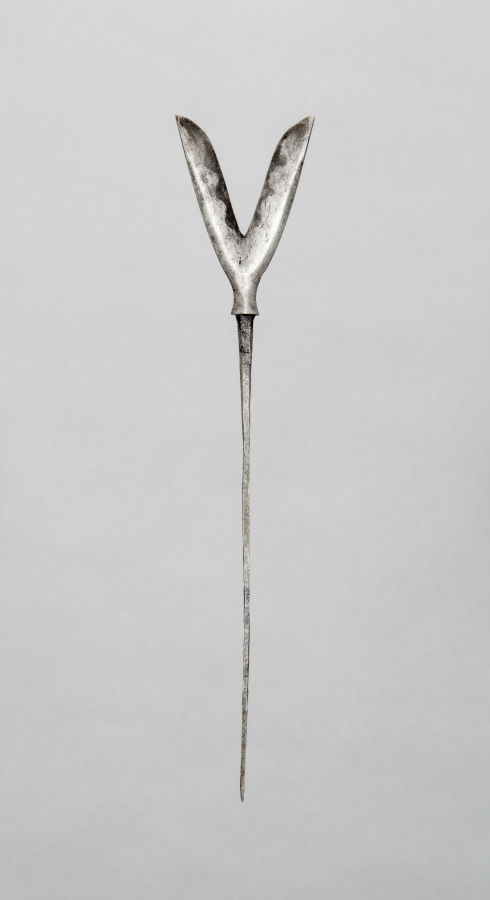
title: Arrow Point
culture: Japan, Edo period (1615–1868)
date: 1700s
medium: steel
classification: Arms and Armor